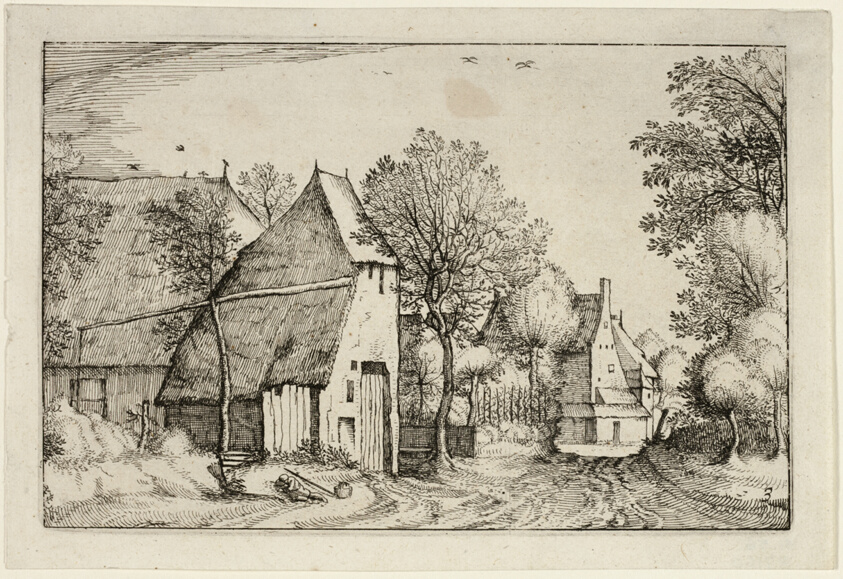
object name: Print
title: Village Road, plate three after Pictures of Farms, Country Houses and Rustic Villages (Praediorum villarum et rusticarum casularum icones)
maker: Claes Jansz. Visscher (Dutch, 1587-1652); after Unknown Flemish Artist, misidentified as Pieter Bruegel, the elder (Flemish, 1525/30-1569)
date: 1612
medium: Etching in black on ivory laid paper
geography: Netherlands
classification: etching; print; prints and drawing